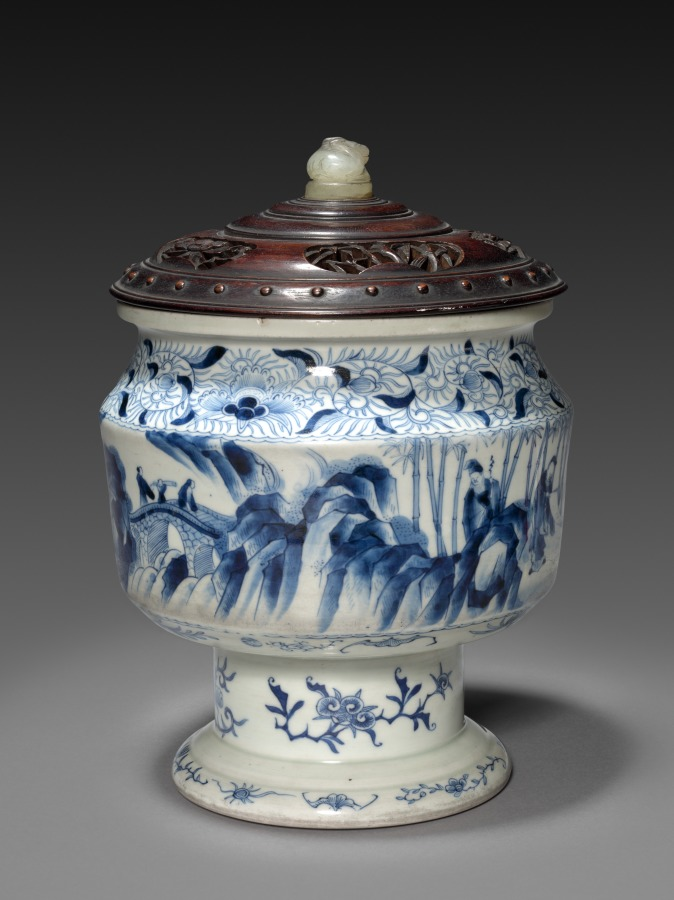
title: Jar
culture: Japan, Edo period (1615–1868)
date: early to mid-1800s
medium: porcelain with underglaze blue; teak and carved stone (lid)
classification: Ceramic